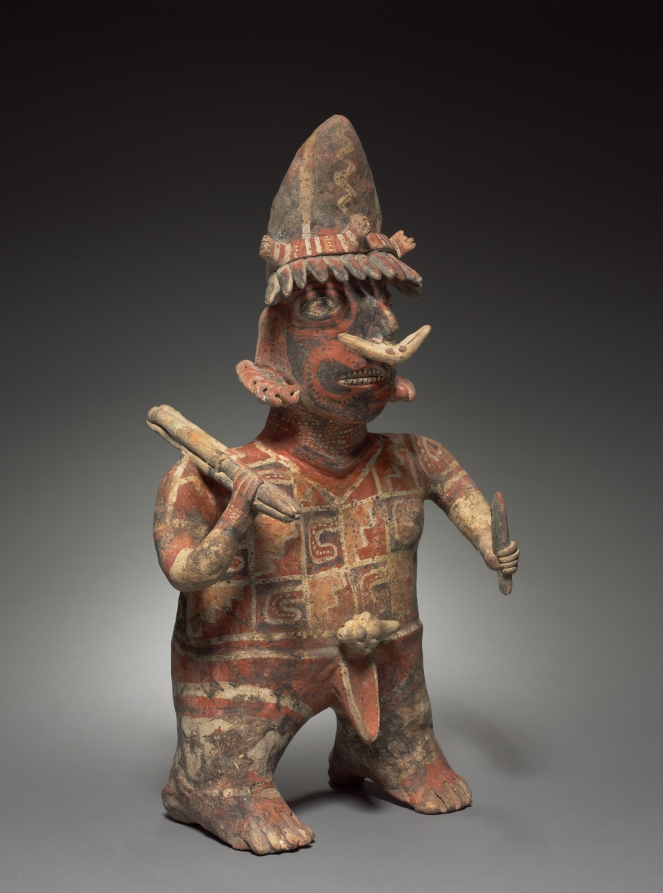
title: Standing Male Figure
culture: Mexico, Nayarit, Ixtlan del Rio Style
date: c. 100 BCE–300 CE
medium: earthenware with colored slips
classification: Sculpture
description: Like his female companion, this male figure is portrayed in all his finery. He carries spears, indicating that he is a hunter or warrior, and his confident grin conveys aggression and vitality.